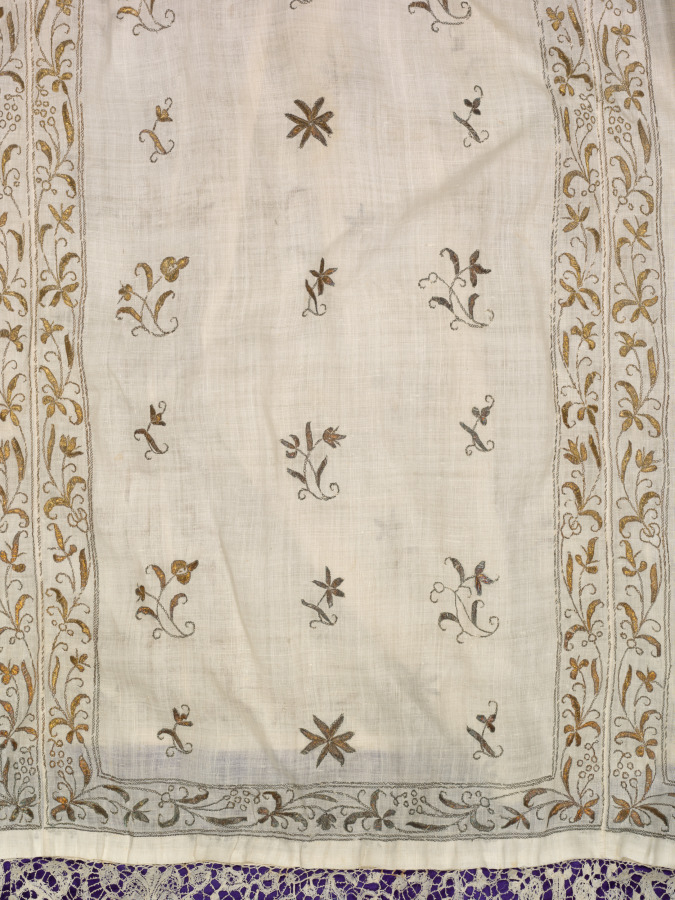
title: Alb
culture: Spain: embroidered linen; Flanders: bobbin lace (Point d’Angleterre) flounce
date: Embroidered Linen: 1600s; Bobbin Lace (Point d’Angleterre) Flounce: 1700s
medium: Plain weave linen embroidered in gold and silver; linen bobbin lace (Point d’Angleterre a Reseau)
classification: Garment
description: This beautiful vestment, called an alb, was worn under other liturgical garments by the clergy who served at the altar. Embroidered with gilt-metal thread flora on a linen ground, it is trimmed with a flounce and cuffs of lace, the most fashionable and expensive material at the time. Its purple silk lining indicates that it belonged to an archbishop. The exquisitely worked bobbin lace consists of two large composite floral designs flanked by popular curved forms on an elaborate bar ground that repeats ten times around the flounce.